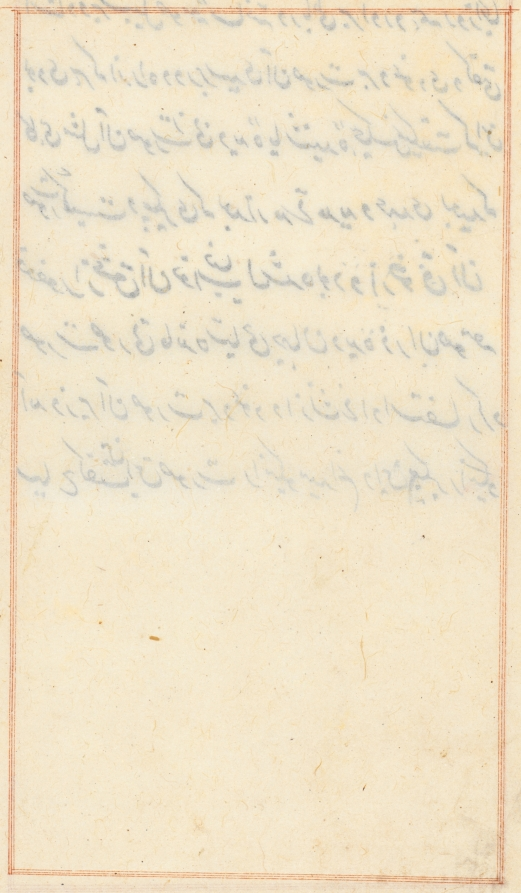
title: Page from Tales of a Parrot (Tuti-nama): text page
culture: Mughal India, court of Akbar (reigned 1556–1605)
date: c. 1560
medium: gum tempera, ink, and gold on paper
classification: Painting